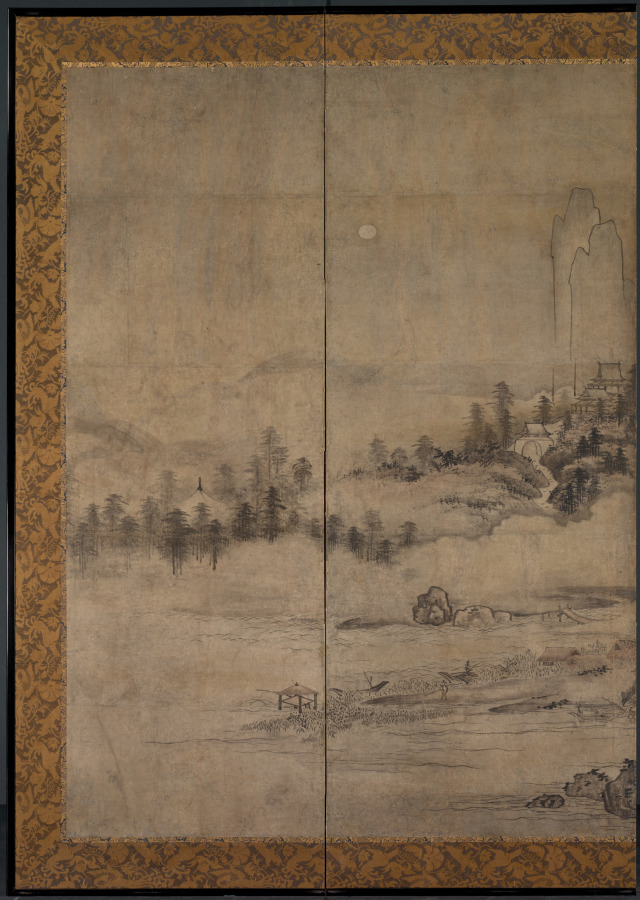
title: Landscape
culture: Japan, Muromachi period (1392–1573)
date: 1550–99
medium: One of a pair of six-panel folding screens; ink and color on paper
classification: Painting